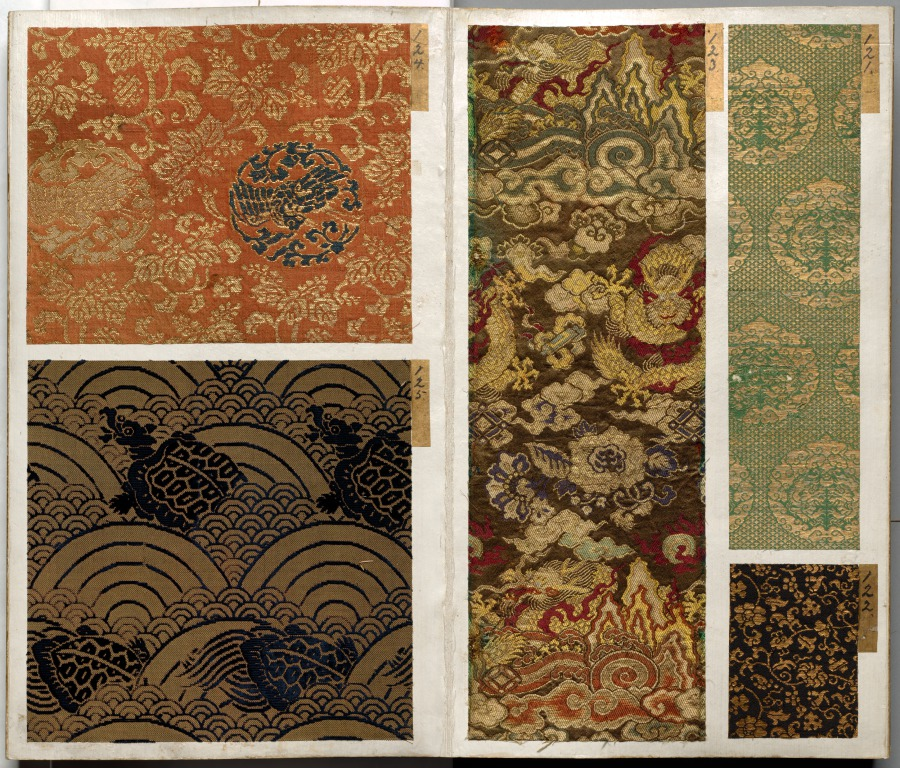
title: Album of Textile Samples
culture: Japan, Edo period (1615–1868)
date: 1600s-1700s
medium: silk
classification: Textile